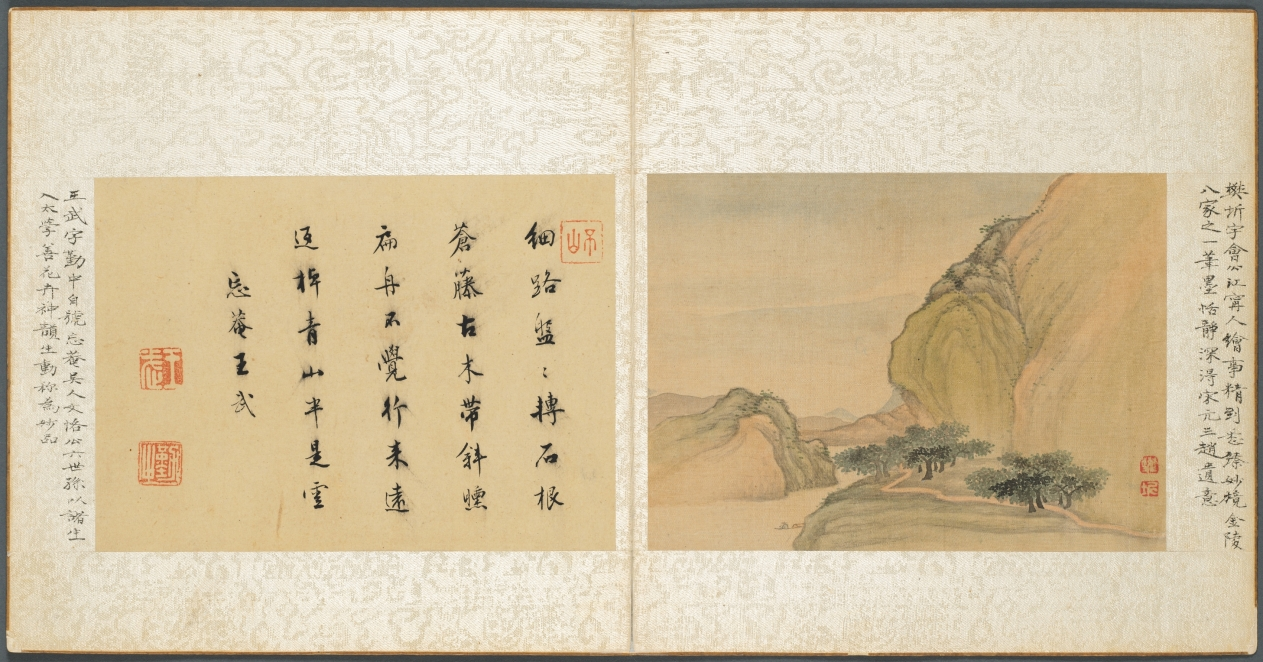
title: Album of Miscellaneous Subjects, Leaf 1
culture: China, Qing dynasty (1644-1911)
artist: Fan Qi (Chinese, 1616–after 1694)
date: early 1650s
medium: album cover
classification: Painting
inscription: Artist seal: Fan Qi 樊圻. Poem by Wang Wu 王武 (1632–1690): A narrow path coiling, winds across rock foundations;/ Old vines and ancient trees meet the sunset's slanting rays./ Unaware that my small boat has gone so far,/ By the time it reverses its oars, the green mountains will be half-covered with clouds.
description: Fan Qi's painting on leaf one may be inspired by Tang dynasty poet's Li Bai's line: A small boat has sailed through ten thousand layers of hills. Wang Wu's colophon facing the painting reads: A narrow path coiling, winds across rock foundations; Old vines and ancient trees meet the sunset's slanting rays. Unaware that my small boat has gone so far, By the time it reverses its oars, the green mountains will be half-covered with clouds.